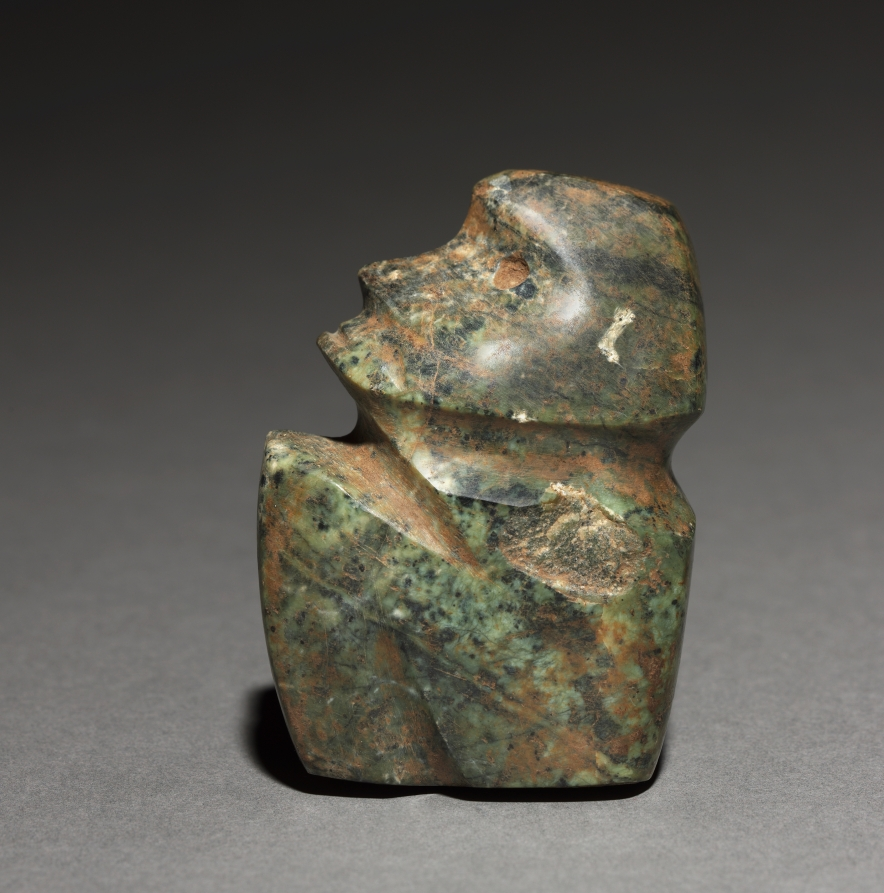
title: Seated Figure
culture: Mesoamerica, Mexico, Guerrero, Mezcala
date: 100 BCE–300 CE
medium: serpentine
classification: Sculpture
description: The Mezcala style takes its name from a river in its homeland, the Guerrero region of western Mexico. The style is known for small-scale sculptures characterized by sleek abstraction and often made of greenstone, one of the most precious materials that Mesoamerican artists worked. Unfortunately, little is known of the sculptures’ meanings and archaeological contexts.